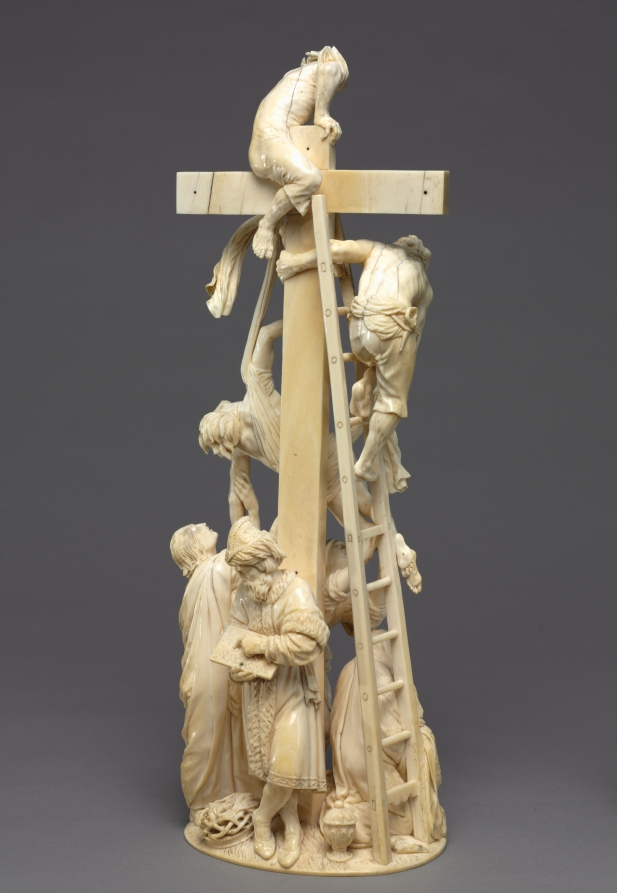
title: Descent from the Cross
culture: Austria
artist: Adam Lenckhardt (German, 1610–1661)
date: 1653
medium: ivory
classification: Sculpture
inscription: inscribed with monogram "AL" conjoined and dated 1653.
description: Carved from a single piece of ivory for Prince Karl Eusebius von Liechtenstein of Vienna, this work is a true tour-de-force. It took Lenckhardt seven years to complete; it is his last known sculpture and the pinnacle of his career. The biblical accounts of the descent from the cross found in the gospels are not consistent, which may contribute to the difficulty in precisely identifying the figures. The Virgin Mary, Saint John, Mary Magdalene, and others were said to be present, but undoubtedly there are other disciples here mourning Christ’s death. The intense emotion registers on the faces of the figures in the scrupulous and exquisitely detailed work.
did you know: Carved from a single elephant tusk, the artist took special care to ensure the ivory did not crack or break as he meticulously crafted each figure in this visually exciting sculpture. Look closely to find tools and small objects included near its base.